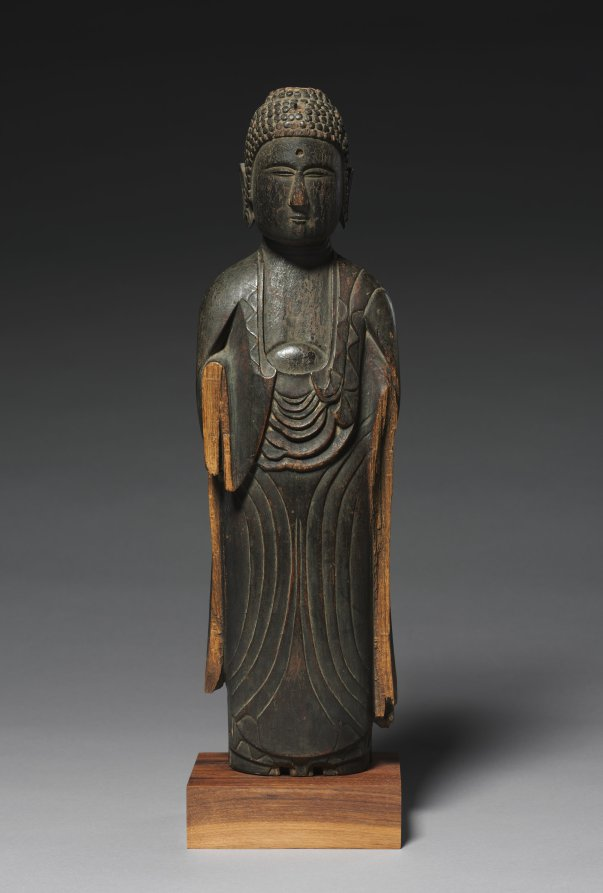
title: Sakyamuni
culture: Korea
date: 1900s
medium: wood with traces of black lacquer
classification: Sculpture